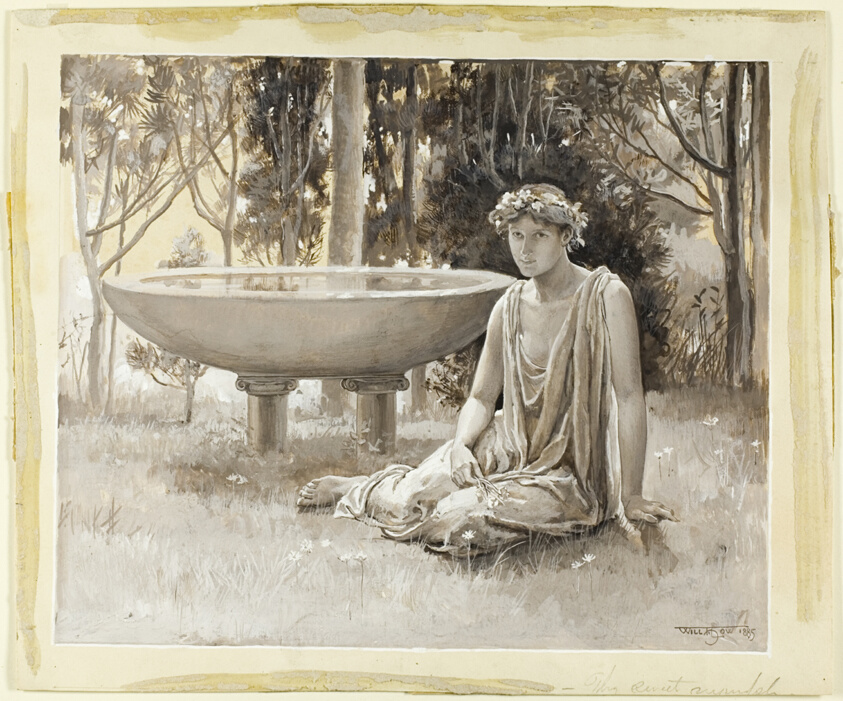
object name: Drawing and Watercolor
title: The Guarded Nymph Near-Smiling on the Green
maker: Will Hicock Low (American, 1853-1932)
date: 1885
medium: Brown and white gouache on cream wove card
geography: United States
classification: drawings (visual works); prints and drawing